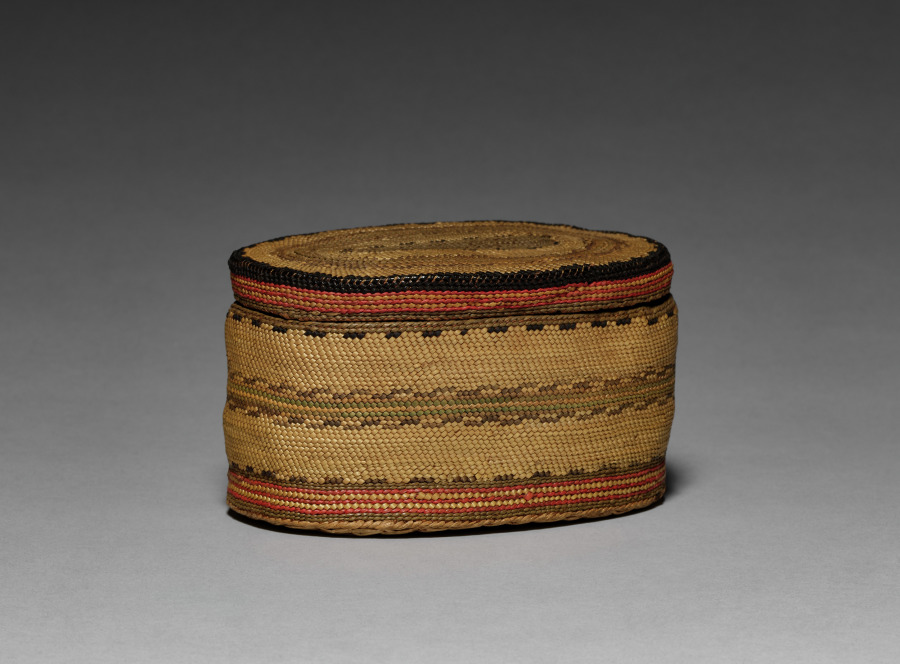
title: Lidded Bowl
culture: Northwest Coast, Vancouver Island, early 20th century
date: c 1900– 1925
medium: twined grass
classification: Basketry